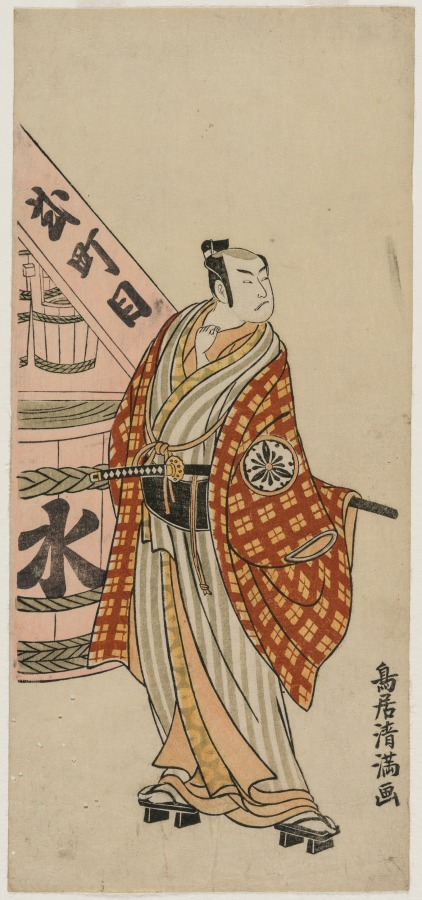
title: Matsumoto Koshiro IV as a Townsman Standing Beside a Water Barrel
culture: Japan, Edo period (1615–1868)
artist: Torii Kiyomitsu (Japanese, 1735–1785)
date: c. 1770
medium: color woodblock print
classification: Print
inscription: Signature: Torii Kiyomitsu ga